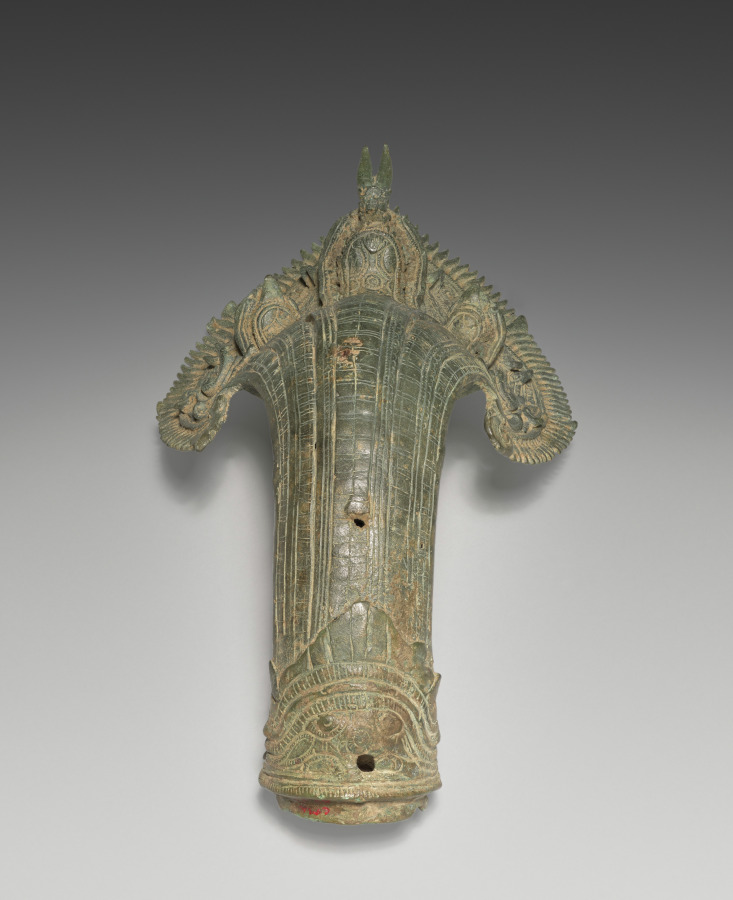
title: Naga Finial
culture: Cambodia, Angkor Wat period, 1100s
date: 1100s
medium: bronze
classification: Metalwork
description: When members of the royal family or priesthood traveled in a public festival procession or to a temple to make offerings or participate in a ceremony, they would be carried in a palanquin, or a covered litter. Portable objects of veneration, such as bronze images or a sacred fire, were also carried on palanquins. The palanquins had wooden poles, hanging seats or raised platforms, and bronze fittings cast in intricate forms and gilt, lending the palanquins a sumptuous quality. The royal palanquins were typically fitted with multiheaded, serpent-shaped finials at the ends of the poles and corners of the elevated platforms. Naga means serpent in Sanskrit, a language from India selectively appropriated by the Khmer in Cambodia. In their own indigenous mythology, the Khmer people trace their descent from a naga princess and a prince from the island of Java who journeyed to Cambodia. The naga remains a potent emblem for the Khmer nation to this day; it is ubiquitous on Cambodian monuments.